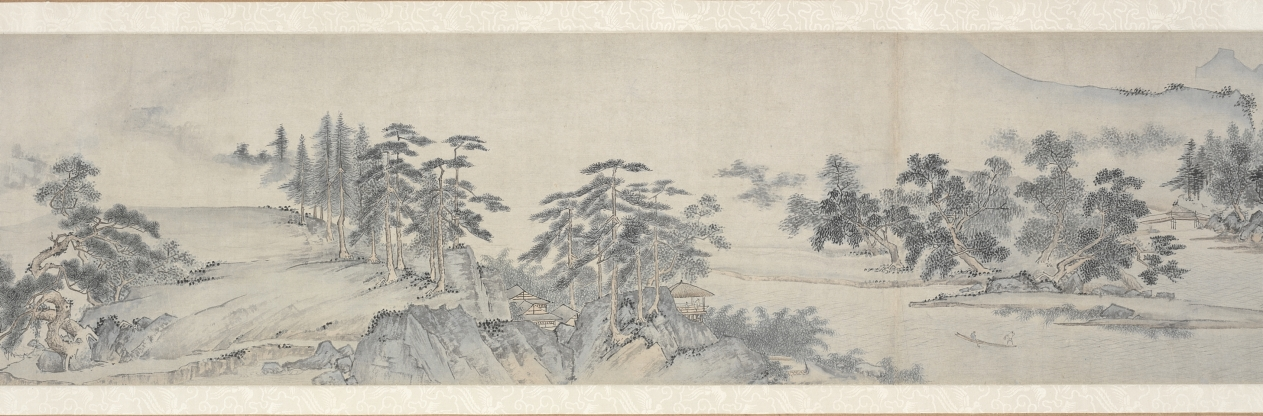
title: Ten Thousand Li of the Yangzi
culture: China, Ming dynasty (1368–1644)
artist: Dai Jin (Chinese, 1388–1462)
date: c. 1400s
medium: Handscroll; ink and color on paper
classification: Painting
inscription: Two colophons at end. Artist's seals: Dai Jin 戴進 and Wenjin 文進.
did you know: Dai Jin is traditionally considered the founder of the Zhe School, a style of landscape painting.